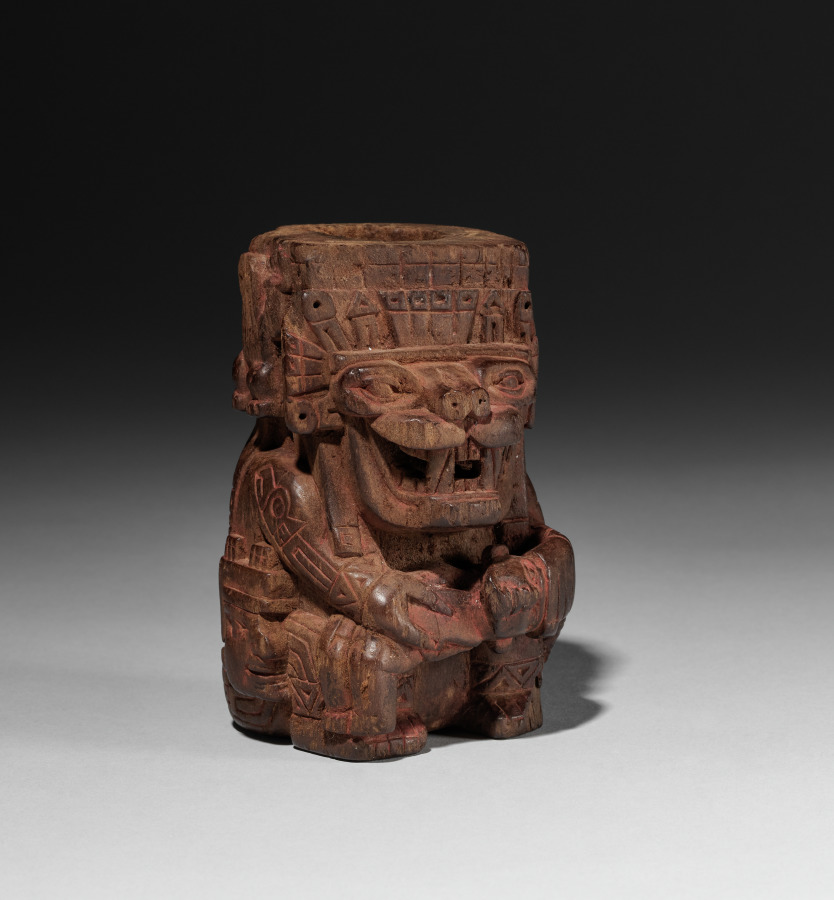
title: Container in the form of a Sacrificer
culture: Peru, Middle Horizon, Wari Culture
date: 770–890 (radiocarbon date, 95% probability)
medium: wood and red pigment (cinnabar)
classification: Wood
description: This container assumes the shape of a magnificent, feline-headed, supernatural sacrificer who draws a knife across the throat of the human it holds in its lap. Severed human heads hang from the feline's belt and dangle by the trachea at the back of its headdress. Sacrifice had a place in Wari religious practice, probably as an unusual and exceptionally precious offering made to entice the benevolence of cosmic forces. Indeed, colonial-period Andean people believed that death was a prerequisite for the renewal of the world.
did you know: Traces of cinnabar, a toxic mercuric sulfide, are visible on the container's surface.